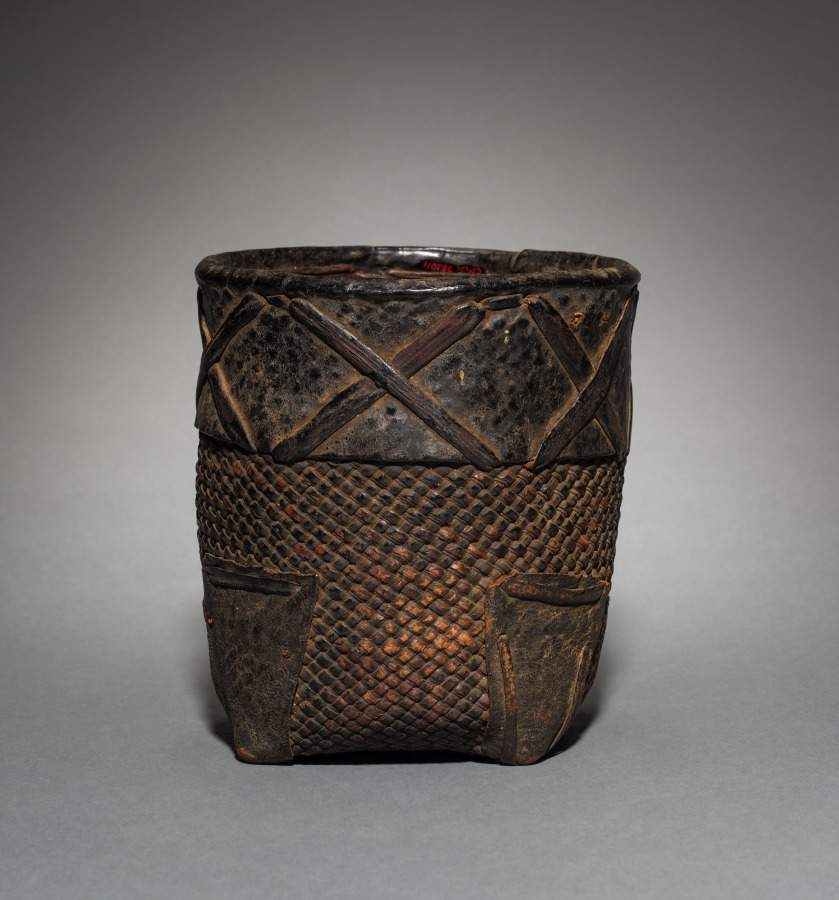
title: One of Ten Nesting Wedding Baskets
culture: Africa, Western Africa, Burkina Faso, Lobi–style maker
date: c. 1900s?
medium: Plant fiber and leather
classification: Vessels